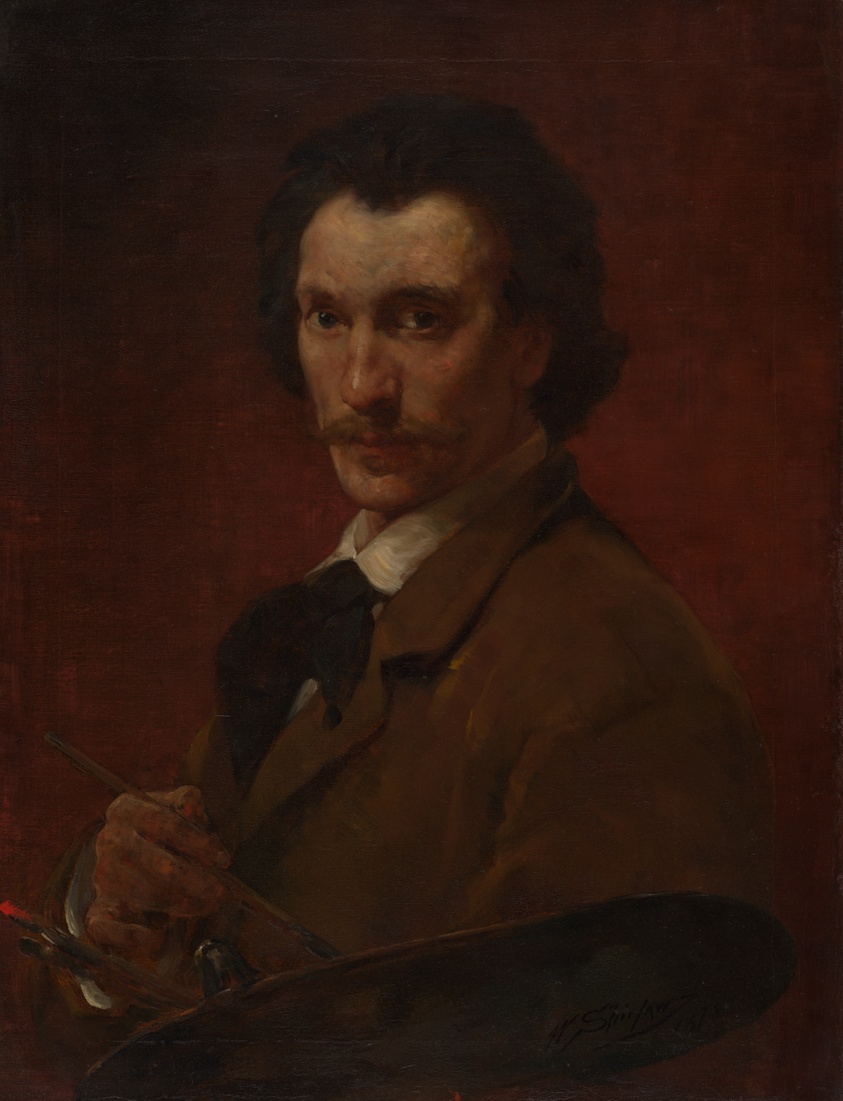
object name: Painting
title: Self-Portrait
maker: Walter Shirlaw (American, 1838–1909)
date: 1878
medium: Oil on canvas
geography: United States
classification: painting; american arts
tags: self-portraits